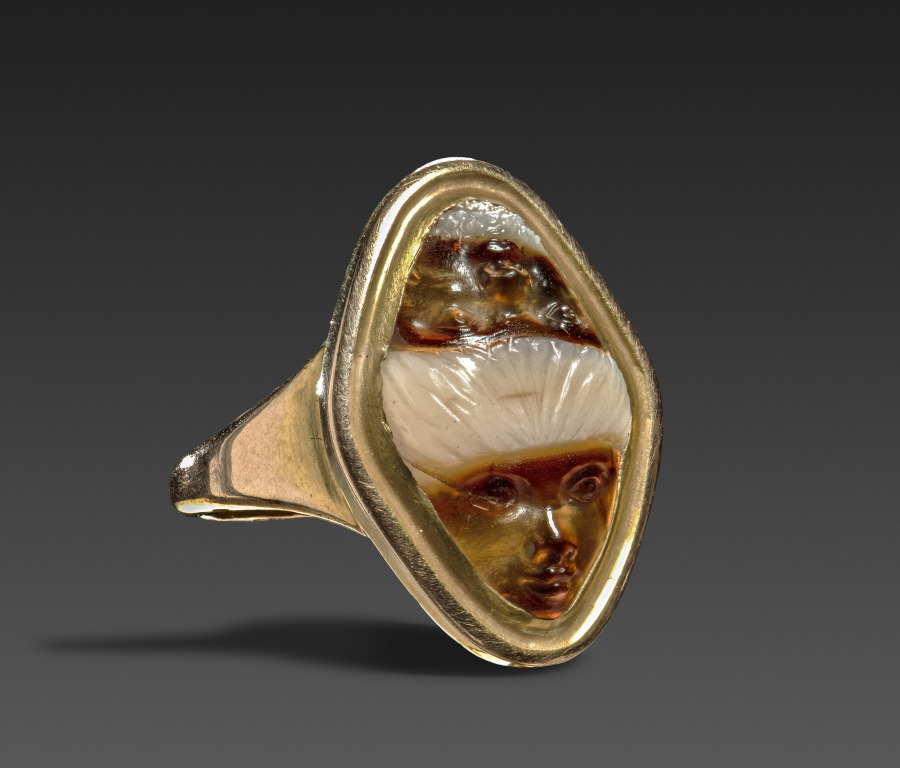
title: Ring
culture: European, 19th century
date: 1800s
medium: metal and hardstone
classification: Jewelry